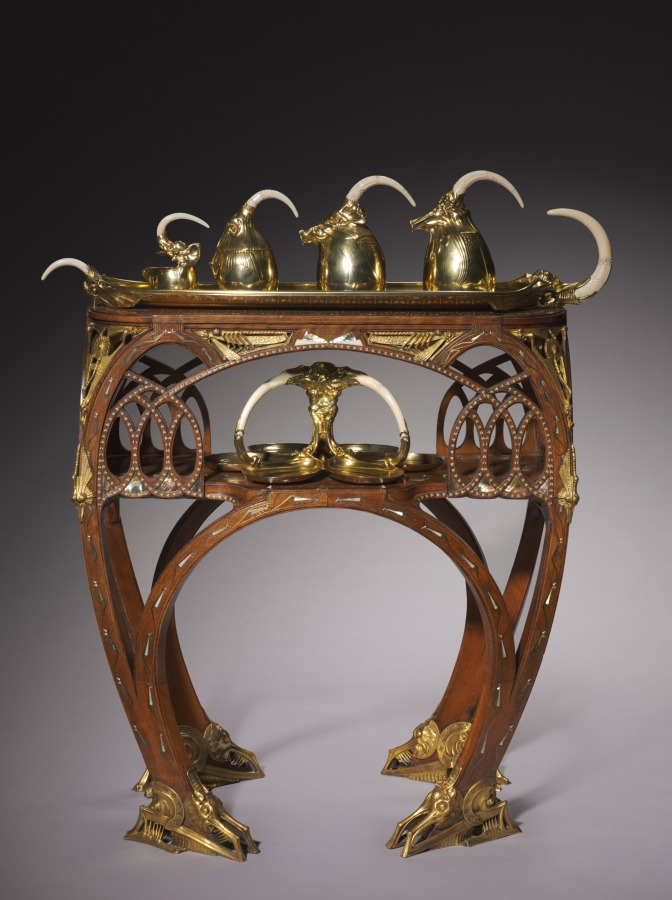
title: Tea Table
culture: France, Paris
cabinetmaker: Carlo Bugatti (Italian, 1856–1940)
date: c. 1907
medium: inlaid wood (mahogany?), cast and gilded bronze mounts, inlays of ivory or bone, metal, and mother-of-pearl (marine mussels or pearl oysters)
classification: Furniture and woodwork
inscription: signed in ligature in white metal inlay on central shelf: Bugatti.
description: Luxurious materials might catch the eye first, but a closer look reveals the imaginary creatures that adorn the surface of this table. Featuring elaborate arches, a favorite motif that appeared throughout Bugatti's furniture, this fantastical imagery is a window into the designer's expressive imagination.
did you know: Carlo Bugatti's sons achieved illustrious careers of their own. Rembrandt Bugatti (1884-1916) became a celebrated sculptor, and Ettore Bugatti (1881-1947) manufactured luxurious automobiles and racing cars.